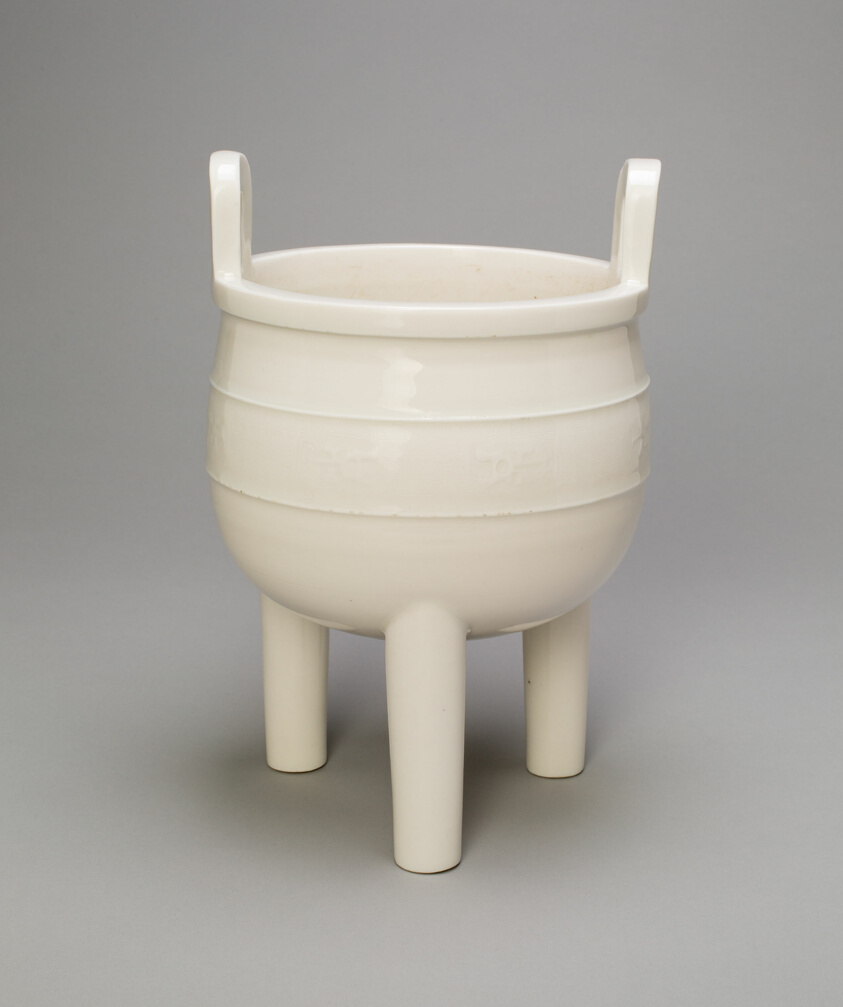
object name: Vessel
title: Censer in the Form of an Ancient Bronze Tripod Cauldron (ding)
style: Chinese (culture or style)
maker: China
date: Qing dynasty (1644–1911)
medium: Porcelain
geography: China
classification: incense burner; porcelain; container; ceremonial object; asian art; ceramics; vessel